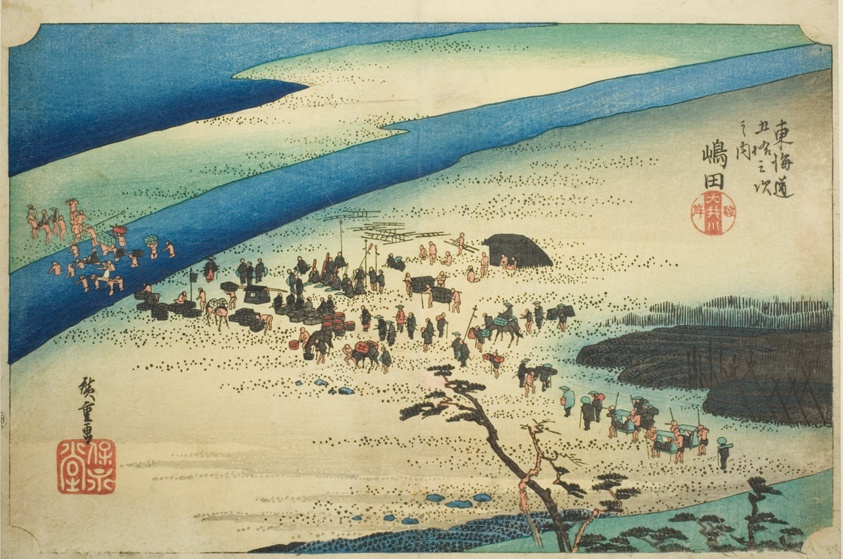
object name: Print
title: Shimada: The Suruga Bank of the Oi River (Shimada, Oigawa Sungan), from the series "Fifty-three Stations of the Tokaido Road (Tokaido gojusan tsugi no uchi)," also known as the Hoeido Tokaido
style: Japanese (culture or style)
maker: Utagawa Hiroshige 歌川 広重; Japanese, 1797-1858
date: c. 1833/34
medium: Color woodblock print; oban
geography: Japan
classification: woodblock print; print; asian art